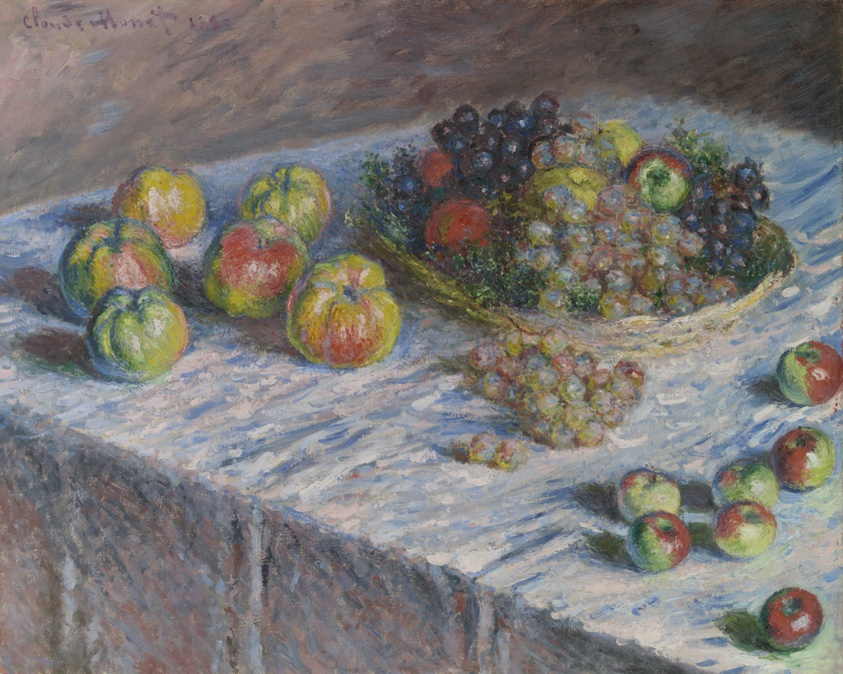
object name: Painting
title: Apples and Grapes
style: Impressionism, nineteenth century, 19th century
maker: Claude Monet (French, 1840–1926)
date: 1880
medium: Oil on canvas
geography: France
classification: painting; still life; french; oil paintings (visual works); oil on canvas; paint; european painting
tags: still life, tables, tablecloth, table, grapes, fruit, apples, food, Century of Progress, world's fairs, Chicago World's Fairs